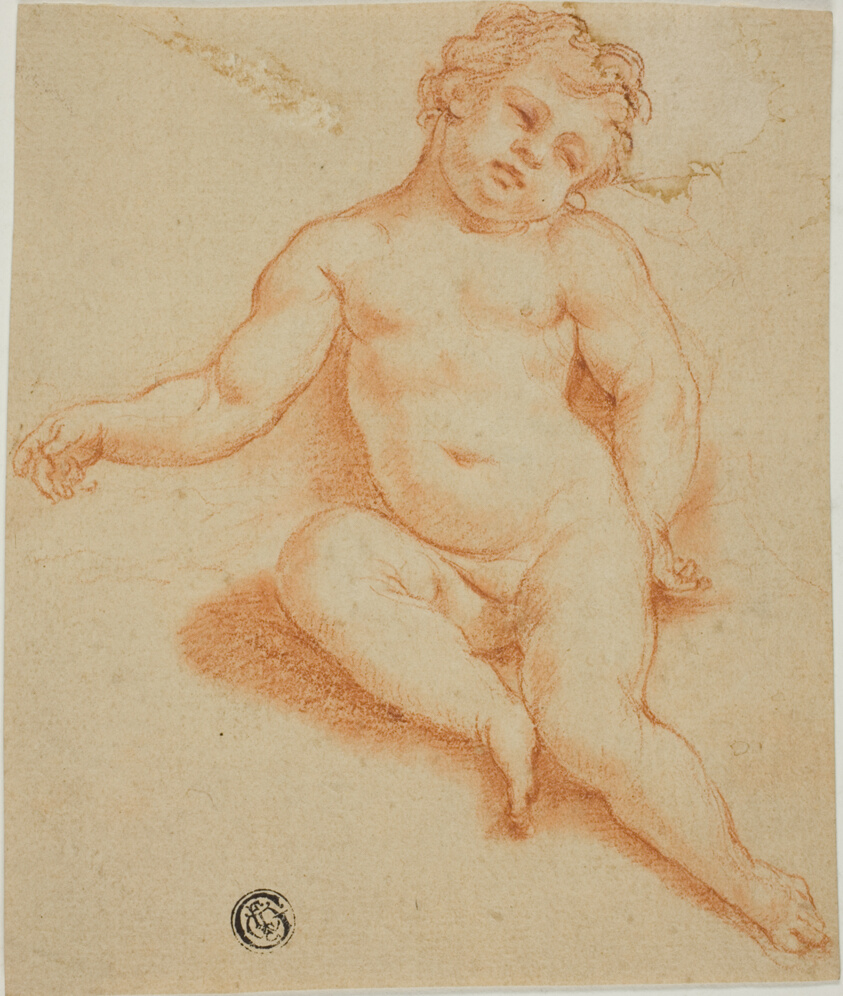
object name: Drawing and Watercolor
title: Seated Putto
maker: Unknown Artist; Italian, n.d.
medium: Red chalk on cream laid paper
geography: Italy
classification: chalk; drawings (visual works); prints and drawing